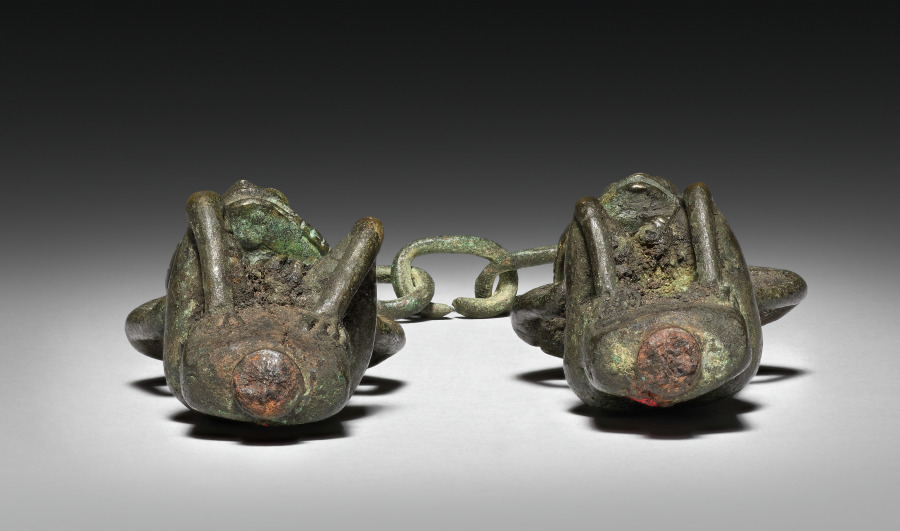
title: Pair of Ritual Staffs (ẹdan Ògbóni)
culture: Africa, West Africa, Nigeria, Yorùbá-style maker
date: possibly 1800s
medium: Copper alloy and iron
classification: Sculpture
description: The chain connecting these two figures allows them to be worn in public by a member of the Ògbóni or Òṣùgbó association as authority emblems. The male on the right gives the association’s typical salute by clasping his left fist on the right one, while the female on the left holds her breasts as a sign of welcome and generosity. The use of copper alloy and iron expresses Ògbóni/Òṣùgbó's concerns with longevity and durability.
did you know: Imagine how this would look when its owner wore it; the chain would go around the back of the neck and the figures would rest on their chest.